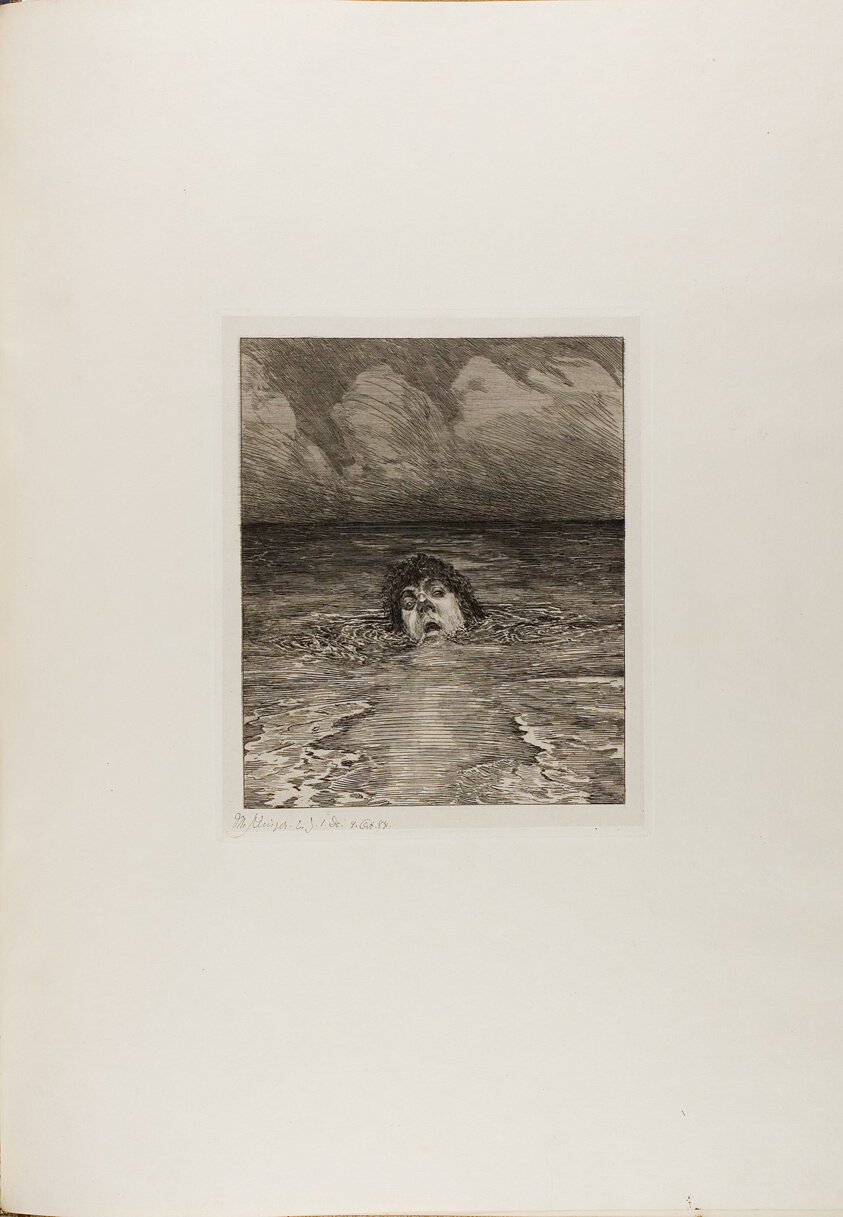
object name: Print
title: Downfall, plate twelve from A Life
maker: Max Klinger (German, 1857-1920); printed by Otto Felsing (German, 19th century)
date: 1884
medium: Etching, with aquatint and drypoint on ivory China paper, laid down on cream laid paper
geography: Germany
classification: etching; print; prints and drawing